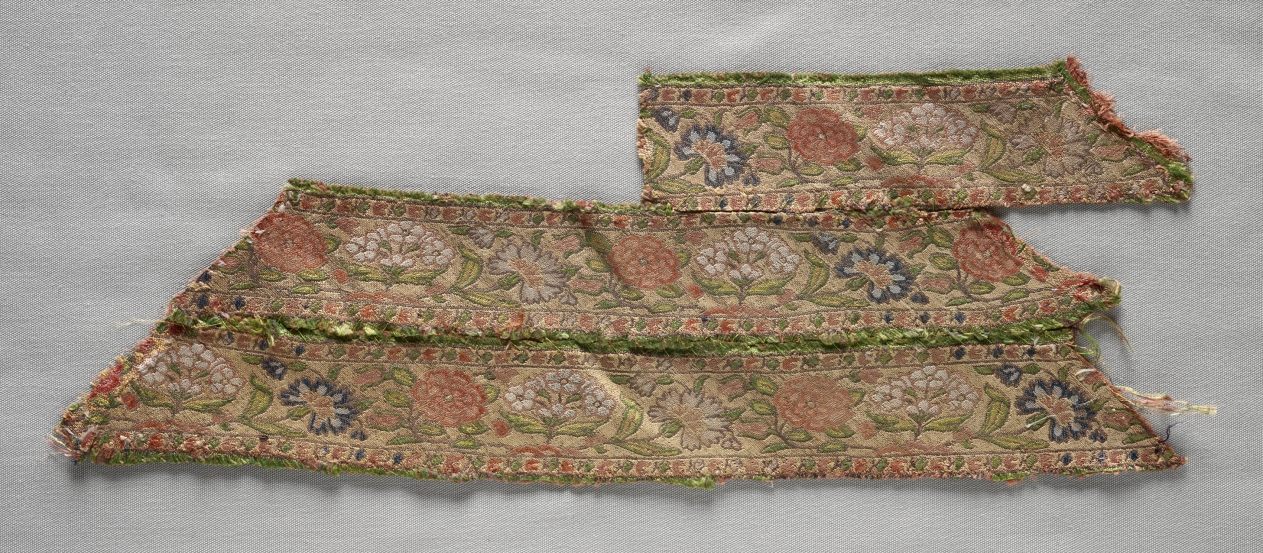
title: Three Strips Pieced Together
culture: Iran, 18th-19th century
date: 1700s - 1800s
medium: compound tabby weave, brocaded; silk and gold filé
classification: Textile